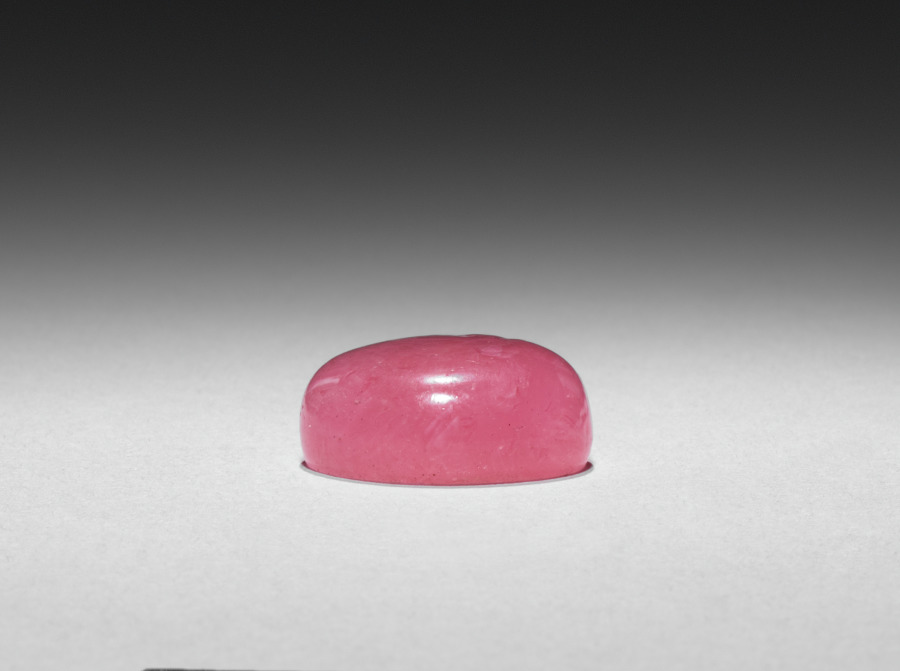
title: Snuff Bottle (stopper)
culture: China, Qing dynasty (1644-1911)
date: 1644–1911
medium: glass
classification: Glass